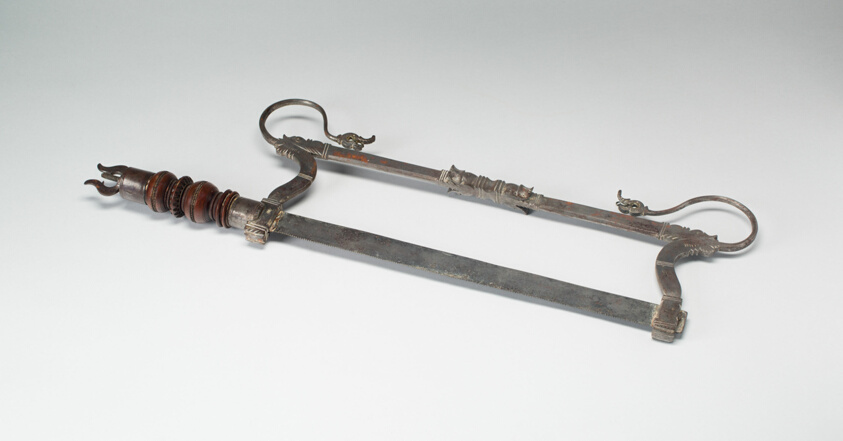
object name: Metalwork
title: Saw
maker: Possibly Germany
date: 1621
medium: Iron and wood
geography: Germany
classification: tool; european decorative arts; metalwork